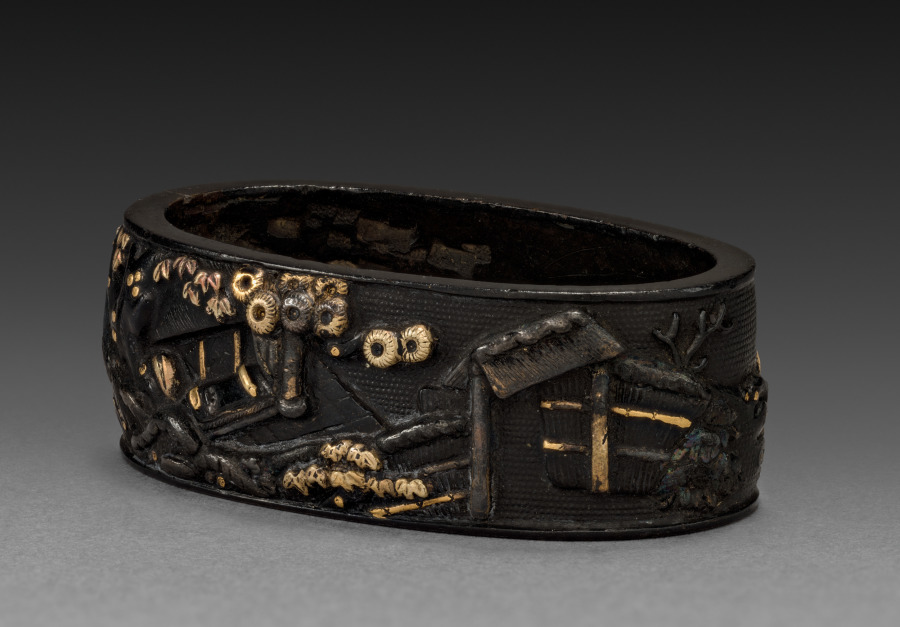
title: Sword-Hilt Collar (Fuchi)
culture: Japan, Edo period (1615–1868)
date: 1700–1850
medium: shakudo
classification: Arms and Armor